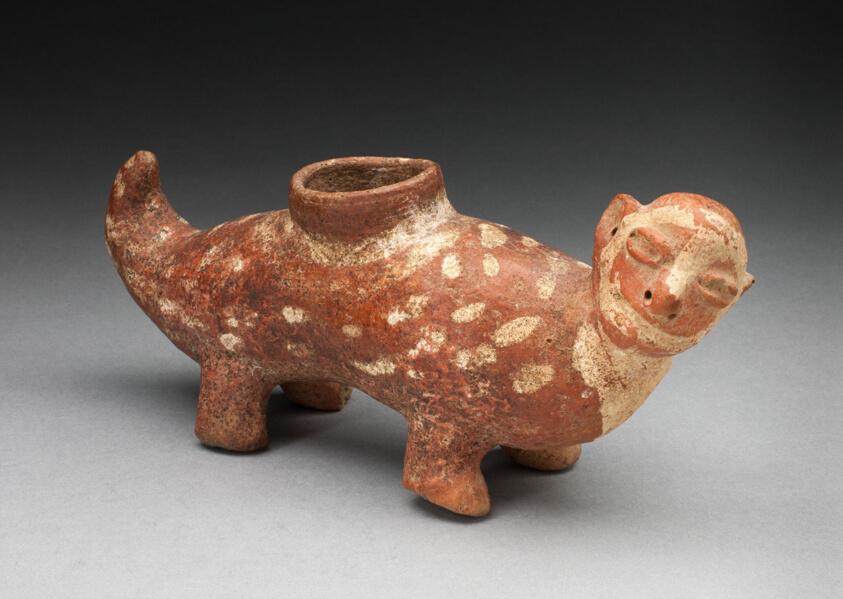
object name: Vessel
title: Vessel in the Form of an Animal with Four Legs and Long Tail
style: gallinazo, early intermediate period, Pre-Columbian, americas, Arts of the Americas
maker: Gallinazo (Virú or Moche Valley, north coast, Peru)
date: 400 BCE–200 CE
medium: Ceramic and pigment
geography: Peruvian North Coast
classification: earthenware; ceramics; vessel; art of the americas